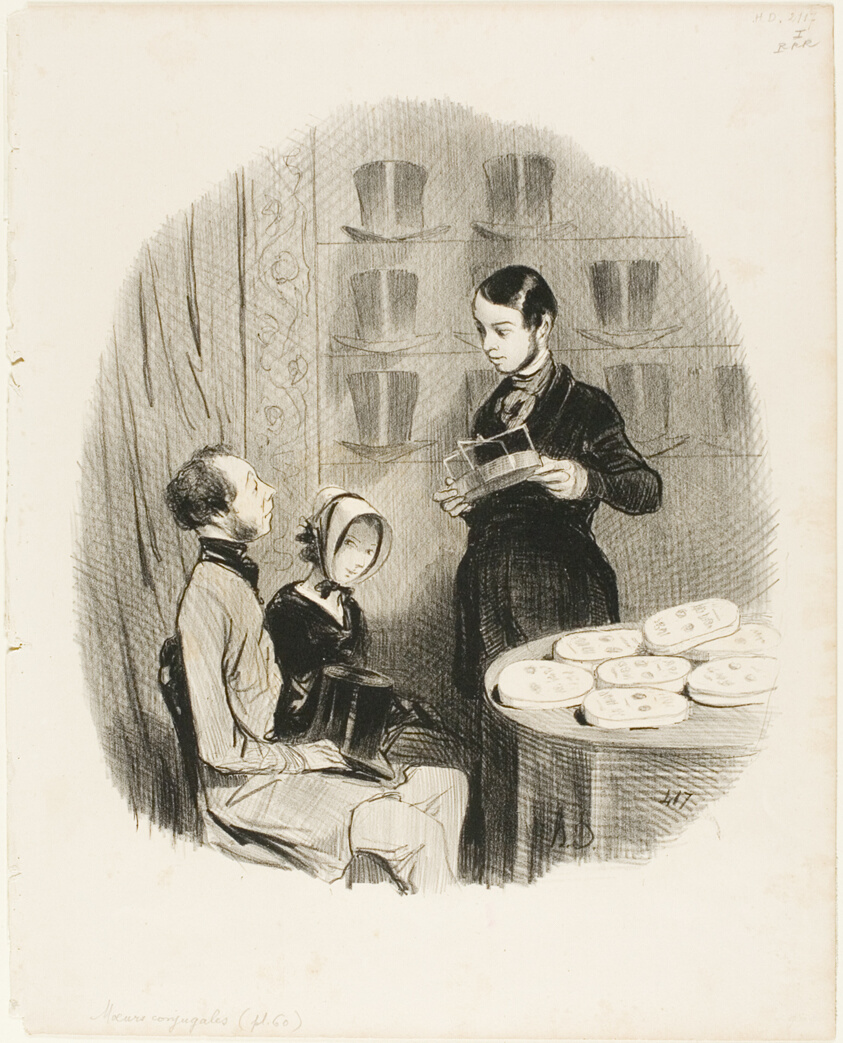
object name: Print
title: The Jayotype. "- Mr. Jay: The gentleman is married? - The gentleman: Certainly, but how the devil did you know that? - Mr. Jay: Oh, its that this instrument is perfect, that no curve of the head, no bump on the forehead can escape it. - The gentleman: How ingenious!," plate 60 from Moeurs Conjugales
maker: Honoré Victorin Daumier (French, 1808-1879); printed by Aubert & Cie. (French, active 19th century); later published by Bauger (French, active 19th century); later published in Le Charivari (French, 1832-1915)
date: 1842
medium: Lithograph in black on white wove paper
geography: France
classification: lithograph; print; prints and drawing